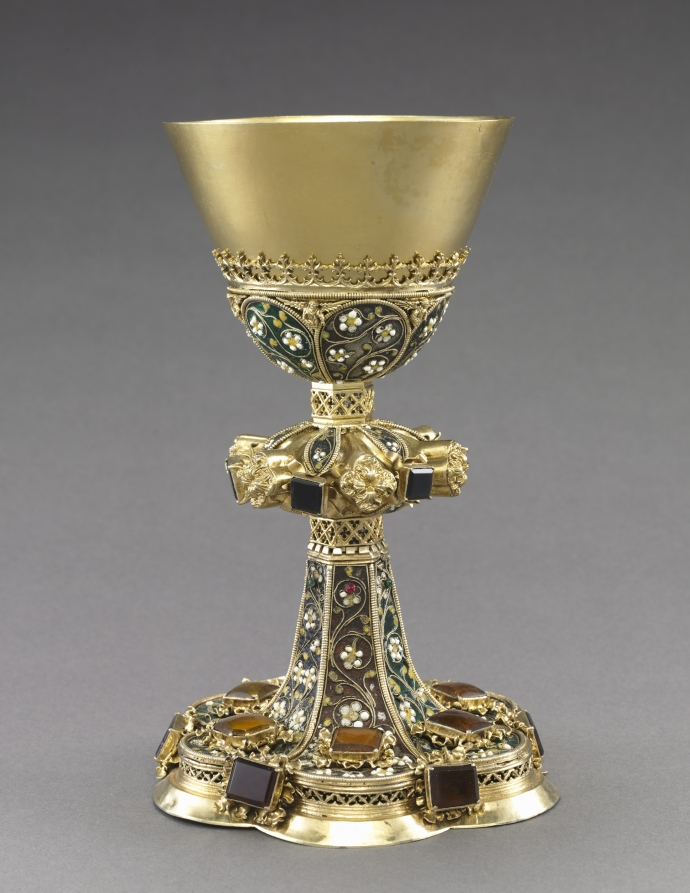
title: Chalice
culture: Hungary, Budapest?, 15th century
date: c. 1450–1480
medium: gilt silver and filigree enamel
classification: Metalwork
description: The chalice and paten—the most important liturgical vessels—are used at the altar by the priest for the consecration of the Eucharistic bread and wine during the celebration of the mass. This chalice survives with its original paten. The form of the chalice evolved over the centuries. Gothic chalices, like this one, gradually developed angular or faceted knops, generally hexagonal, with lobed feet. This sublime example is decorated with filigree enamel consisting of twisted gold wire forming a floral design, which in turn is filled with colorful glass pastes. Gemstones add to the embellishment.